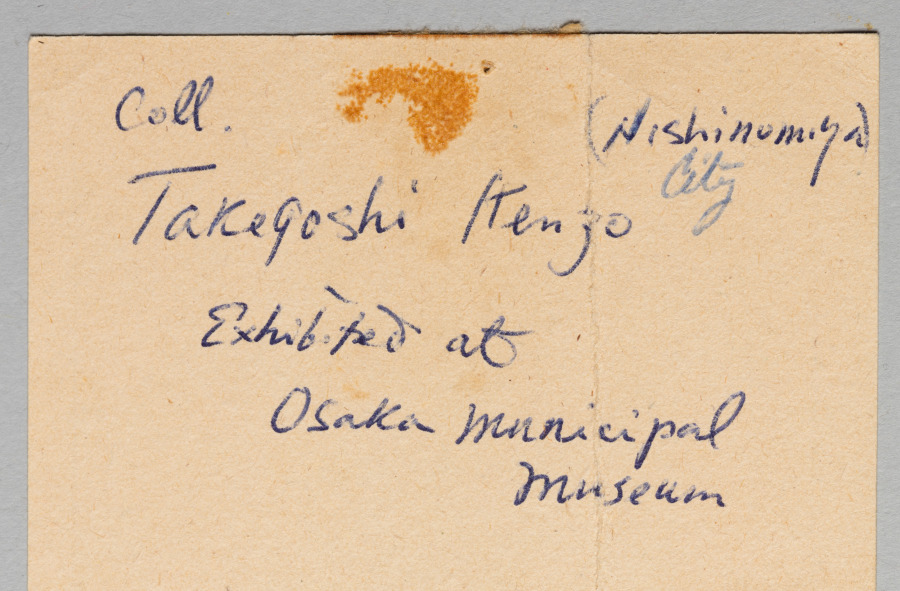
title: Mountain and River in Storm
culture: Japan, Edo period (1615–1868)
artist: Hirowatari Setsuzan (Japanese, ?-1674)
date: early to mid-1600s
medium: hanging scroll; ink on paper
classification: Painting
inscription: signed: Setsuzan hitsu